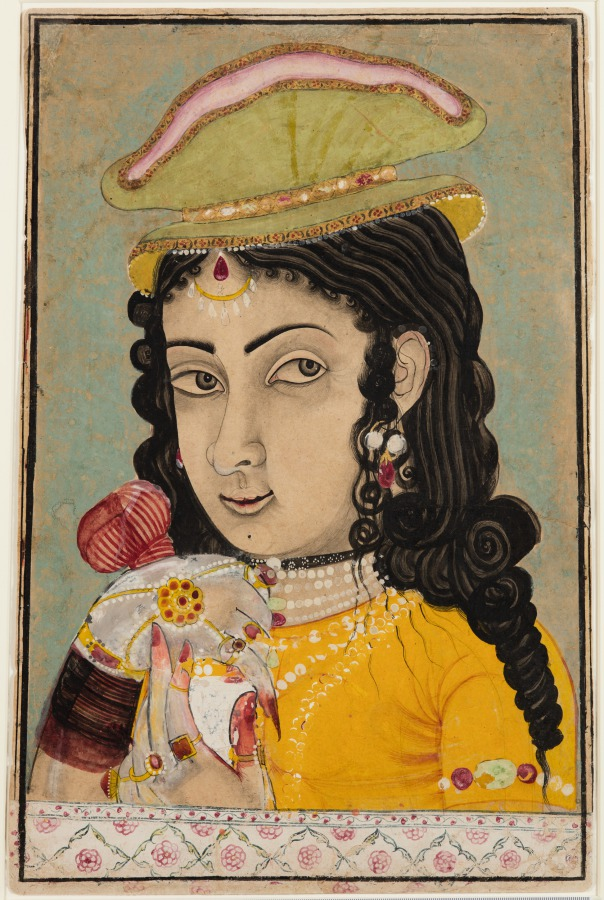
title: A European Woman Pouring Wine into a Cup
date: c. 1710–20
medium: gum tempera and gold on paper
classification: Painting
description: A woman looks sharply, almost surreptitiously, to one side as she pours wine from a red glass bottle. She has long and curly tresses and a green beret inspired by European styles, though she wears Indian jewelry. Images loosely based on prints that made their way to India from Europe were in vogue in Rajasthan during the 18th century.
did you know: The black-and-white coloration and shading of her face indicate that this painting was made to look like a colored etching.